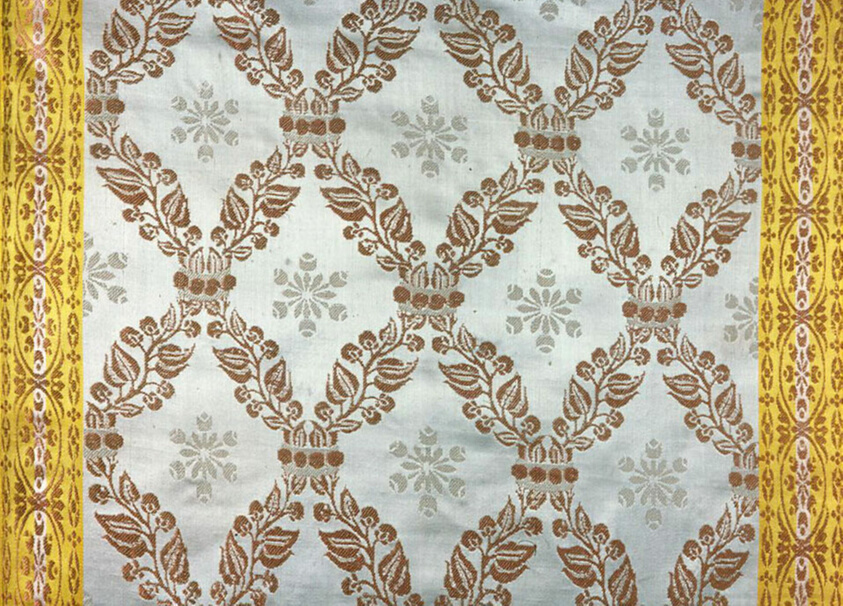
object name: Textile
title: Panel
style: empire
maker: France, Lyon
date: Empire period, 1810/13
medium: Silk, satin weave self-patterned by ground wefts bound in twill interlacings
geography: France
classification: textile; weaving